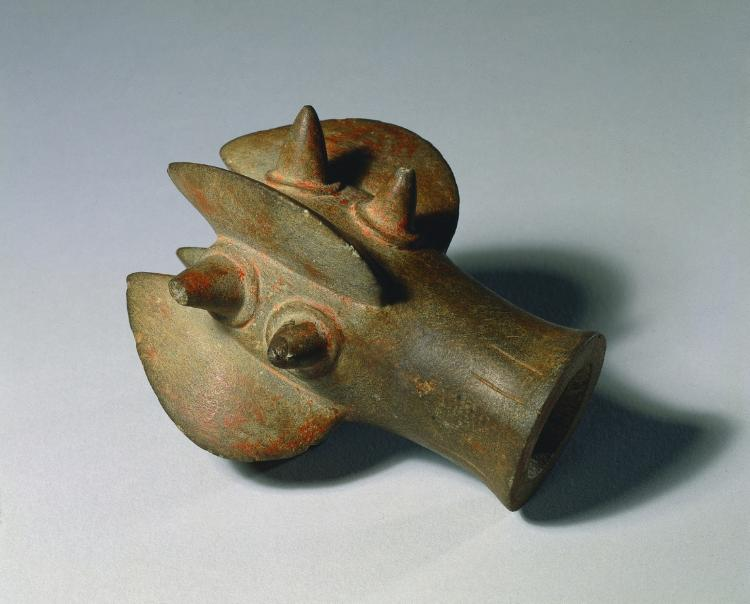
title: Mace Head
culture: North coast of Peru, Salinar culture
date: c. 200 BCE–100 CE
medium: stone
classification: Stone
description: This handsome object was slipped onto a wooden shaft to form a mace, a club-like weapon used in war. It is unclear, however, whether the ancients used examples as well carved as this one in anything but ceremonial circumstances.